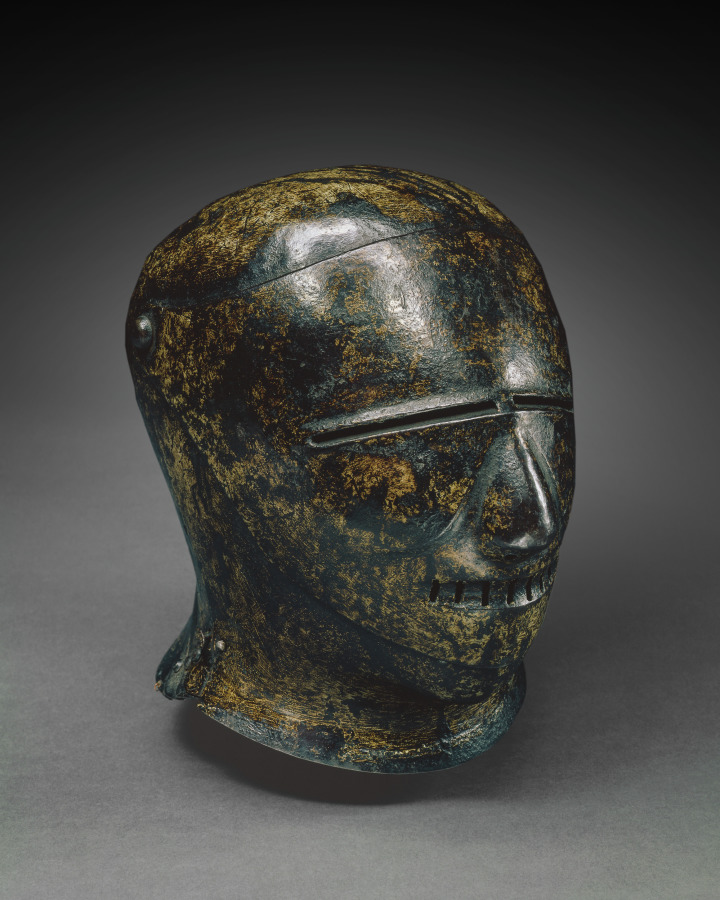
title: Closed Sallet with Grotesque Face (Schembart visor)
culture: Germany, Nuremberg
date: c. 1500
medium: painted steel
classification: Arms and Armor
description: A small number of similar painted helmets survive today. All appear to date to the early 1500s. The visors of these helmets are usually in the form of fiercely grimacing human or animal faces, known as Schembart visors after the masked revelers in the Schembartlaufen, the medieval Shrovetide parades. The city of Nuremberg was particularly famous for its Shrovetide parades that were often held in conjunction with a tournament in which the younger members of the city's patrician families, presumably sporting such helmets, participated.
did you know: Masked revelers at the Schembartlaufen of Nuremberg enjoyed food, drink, music, and dancing until coming to an abrupt end in 1539 due to the objections of a preacher.